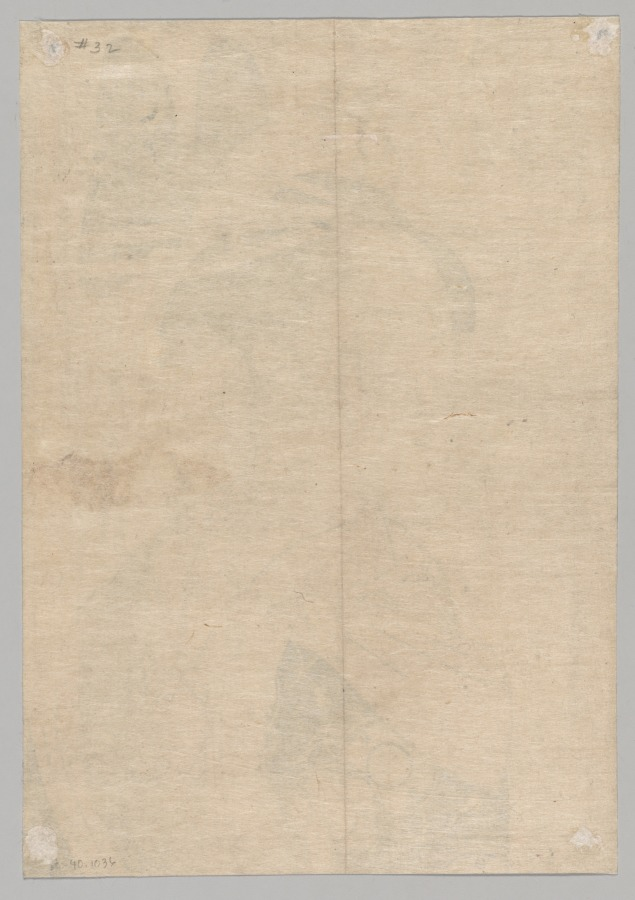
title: Woman of the Yoshiwara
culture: Japan, Edo period (1615–1868)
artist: Kitagawa Utamaro (Japanese, c. 1754–1806)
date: 1753–1806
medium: color woodblock print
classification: Print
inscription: Signature: Utamaro fude